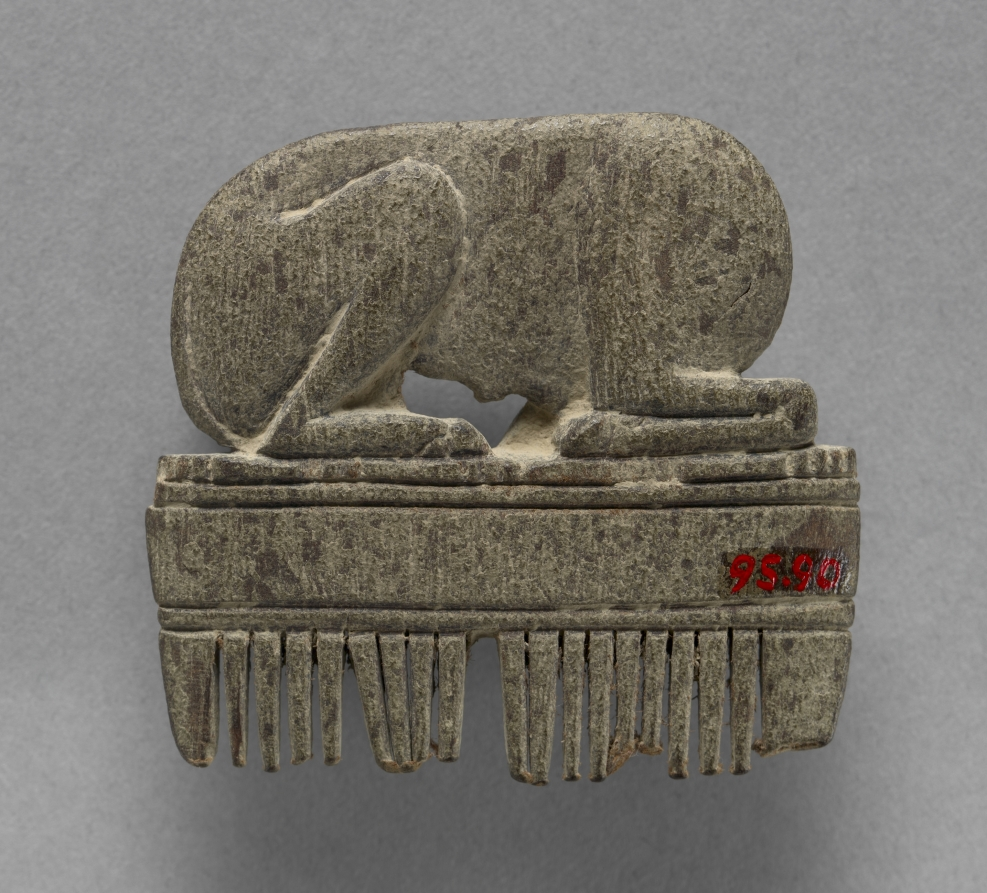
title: Comb with Gazelle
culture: Egypt, New Kingdom (1540–1069 BCE), Dynasty 18, reign of Amenhotep III (1390–1352 BCE)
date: c. 1391–1353 BCE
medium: wood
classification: Cosmetic Objects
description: Both ancient Egyptian men and women loved cosmetics. Unguents, oils, and perfumes made from aromatic plant resins and gums were obtained at great cost from distant lands. The objects identified with cosmetics were given lavish treatment. The luxurious obsidian and gold beaker hints at the precious contents it once held. Others are fanciful in form, such as an ostrich egg. The god Bes, patron god of cosmetics, himself is the subject of a colorful jar. The delicately carved human face and the head of a giraffe decorated elaborate ivory cosmetic spoons.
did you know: This ivory comb was likely a treasured cosmetic object.